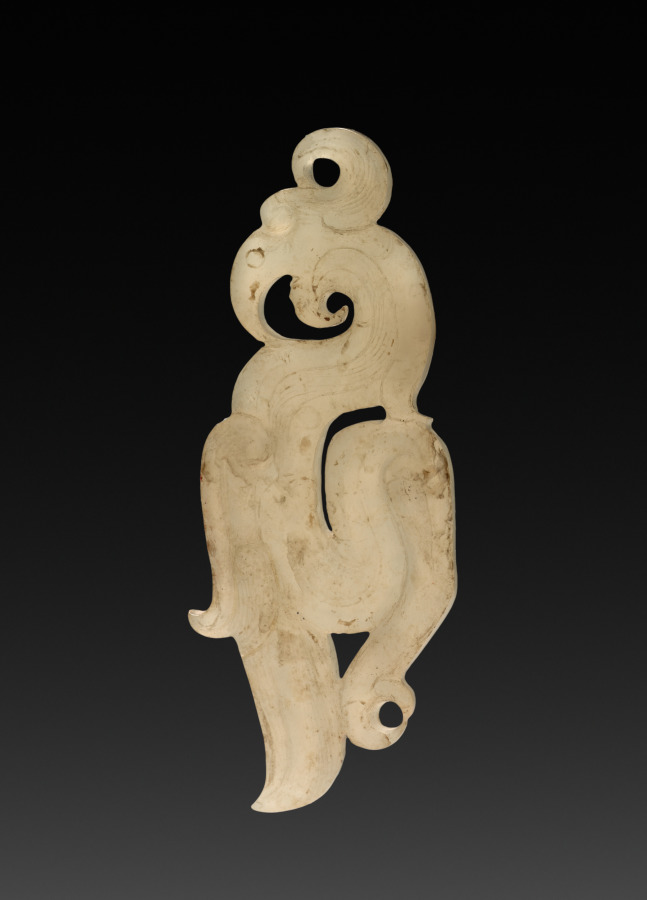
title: Curvilinear Bird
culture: China, Eastern Zhou dynasty (770–256 BCE), Warring States period (475–221 BCE)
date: 475–221 BCE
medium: nephrite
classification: Jade